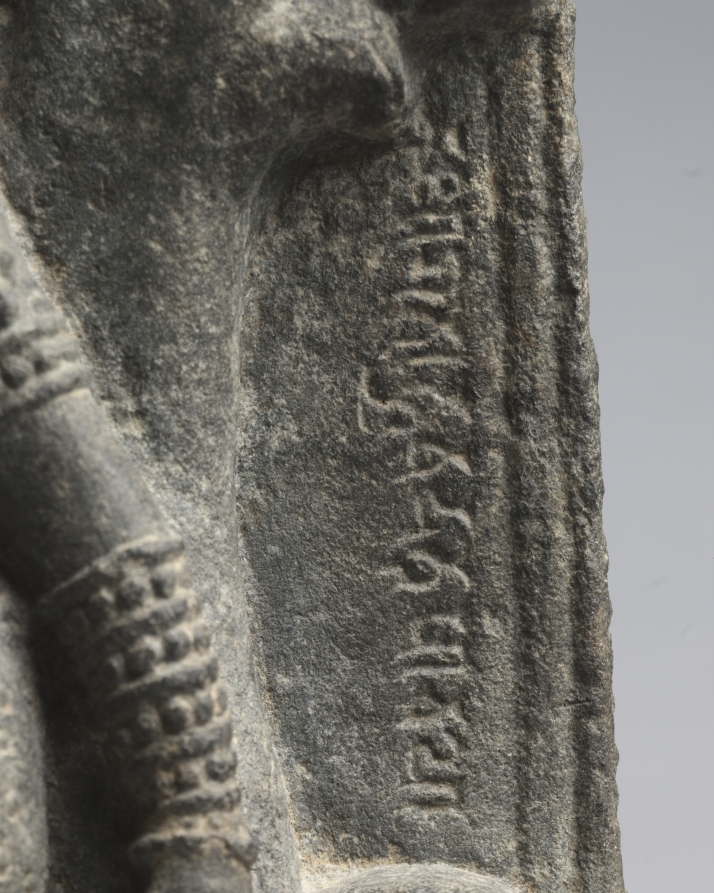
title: Birth of the Buddha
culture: Northeastern India, Bengal, Pala dynasty (730-1197)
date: 800s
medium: Black chlorite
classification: Sculpture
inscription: Phenomena arise from causes;/ The causes have been revealed by the Buddha,/ As have the means for their cessation;/ Thus has been declared by the Great Ascetic.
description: The historical Buddha known as Shakyamuni was born Prince Siddhartha around the end of the 400s BCE near the border of what is today India and Nepal. His mother, Queen Maya, was traveling from her husband’s capital to her family home to give birth, but the baby came early and was born in a grove of shala trees. The miraculous circumstances of his birth are related in a number of textual sources. They state that he emerged from her right side, so Queen Maya here is shown grasping the branch of a tree with her right hand raised, like a nature divinity. The baby was received by Indra, king of the gods, and immediately he took seven steps. The figure at the lower right is Brahma, the Hindu god of creation. In works of Buddhist art, Hindu gods appear as subservient or inferior to the Buddha. The Sanskrit inscription records a common Buddhist prayer of this period: Phenomena arise from causes; The causes have been revealed by the Buddha, As have the means for their cessation; Thus has been declared by the Great Ascetic.